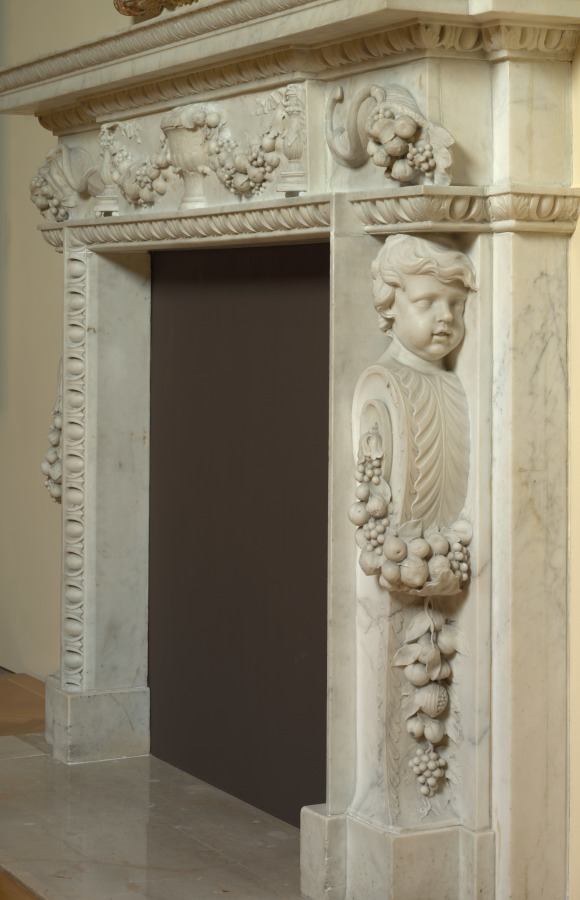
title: Mantel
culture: England, 18th century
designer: after Inigo Jones (English, 1573–1652)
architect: probably by William Kent (British, 1685–1748)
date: c. 1730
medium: marble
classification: Furniture and woodwork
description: The cornucopias and scroll-shaped brackets capped by the bust of the youthful Roman god, Mercury, were inspired by the work of Inigo Jones, one of the first British architects of great renown. The mantel was originally installed in Wanstead House, formerly located on the outskirts of London. Working opposite the architect, Colen Campbell (1676–1729), William Kent completed the interior decoration of the estate and likely produced this mantel as well. When Wanstead House was pulled down in 1822, the Duke of Hamilton purchased the chimney piece and three others from Wanstead House to display in his own home near Glasgow, Scotland.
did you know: Here the presence of the Roman god of trade and abundance (Mercury) within the decorative scheme of this mantel alludes to prosperity and bounty.